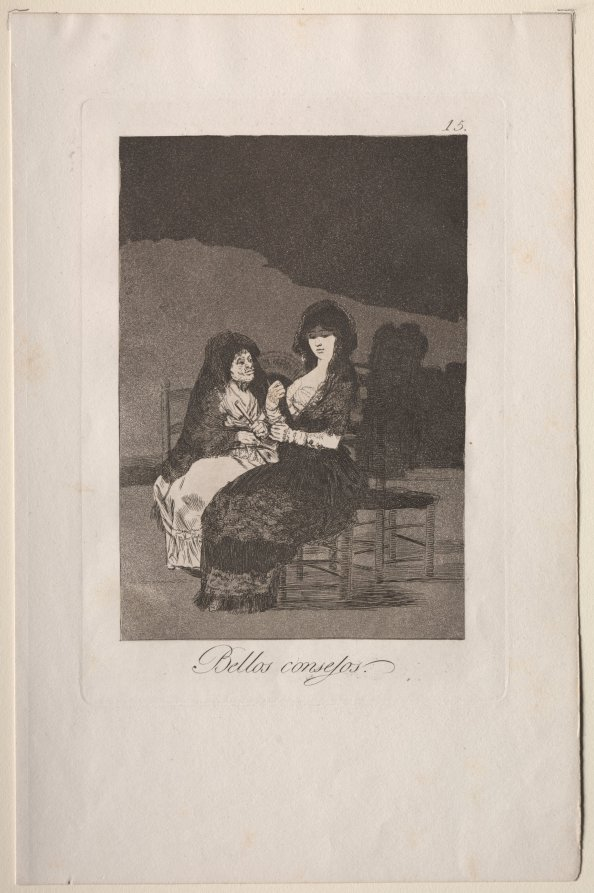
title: Pretty Advice, Plate 15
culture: Spain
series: Los Caprichos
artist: Francisco de Goya (Spanish, 1746–1828)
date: 1799, printed c. 1855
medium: etching and aquatint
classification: Print